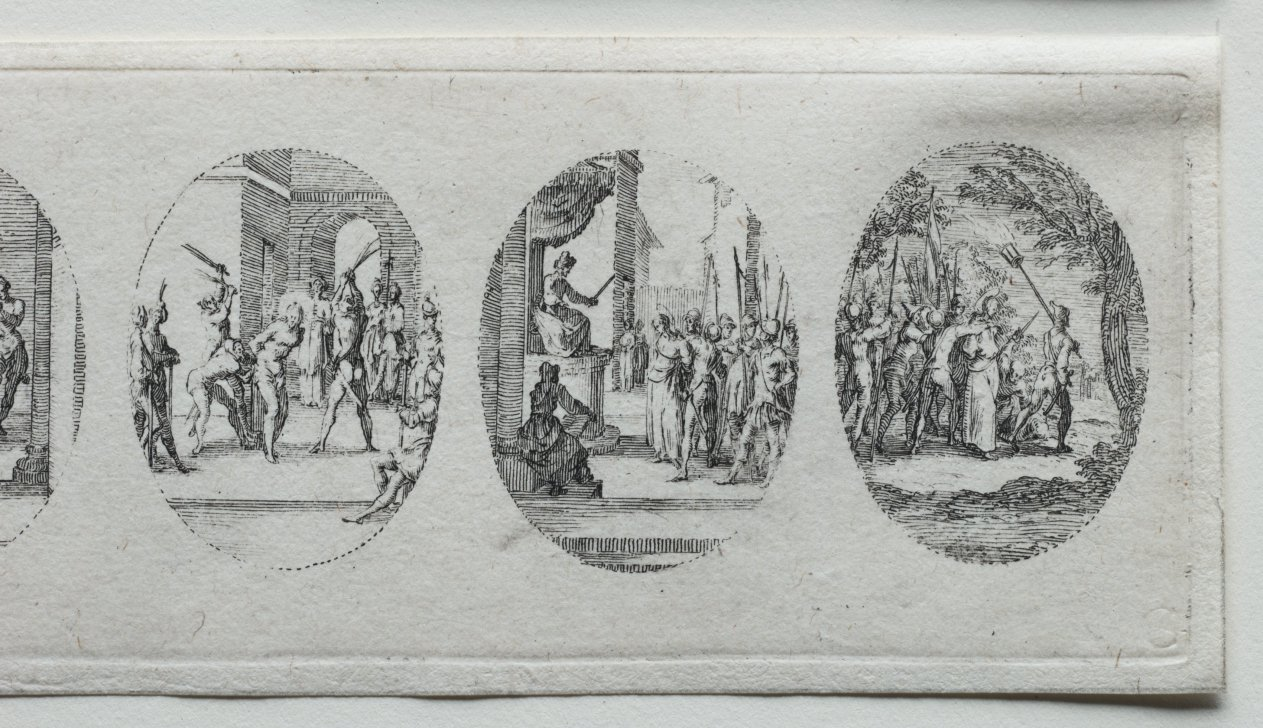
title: The Mysteries of the Passion: The Flagellation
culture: France, 17th century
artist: Jacques Callot (French, 1592–1635)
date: 1631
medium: etching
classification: Print